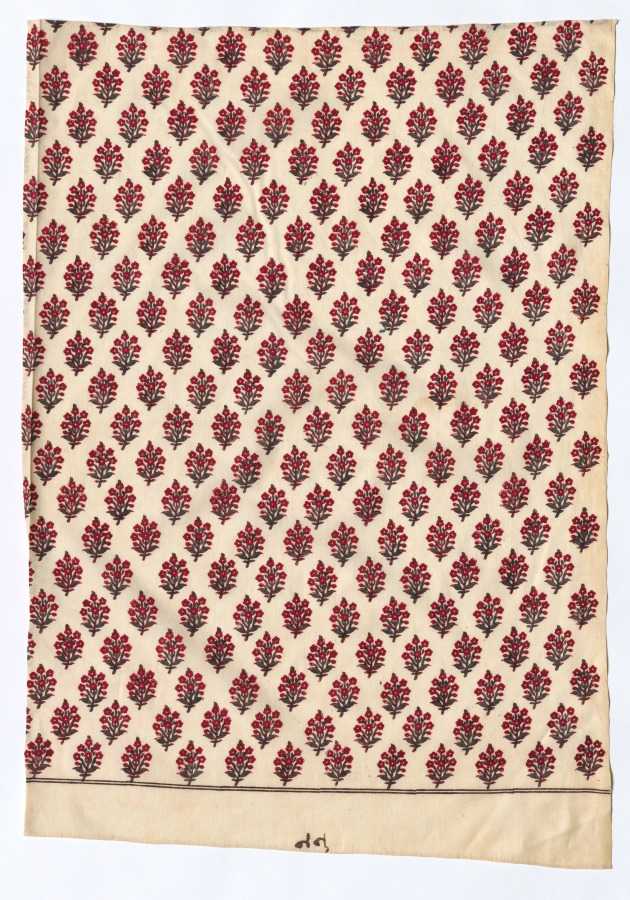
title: Fragment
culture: India, early 19th century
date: early 1800s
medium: printed cotton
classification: Textile